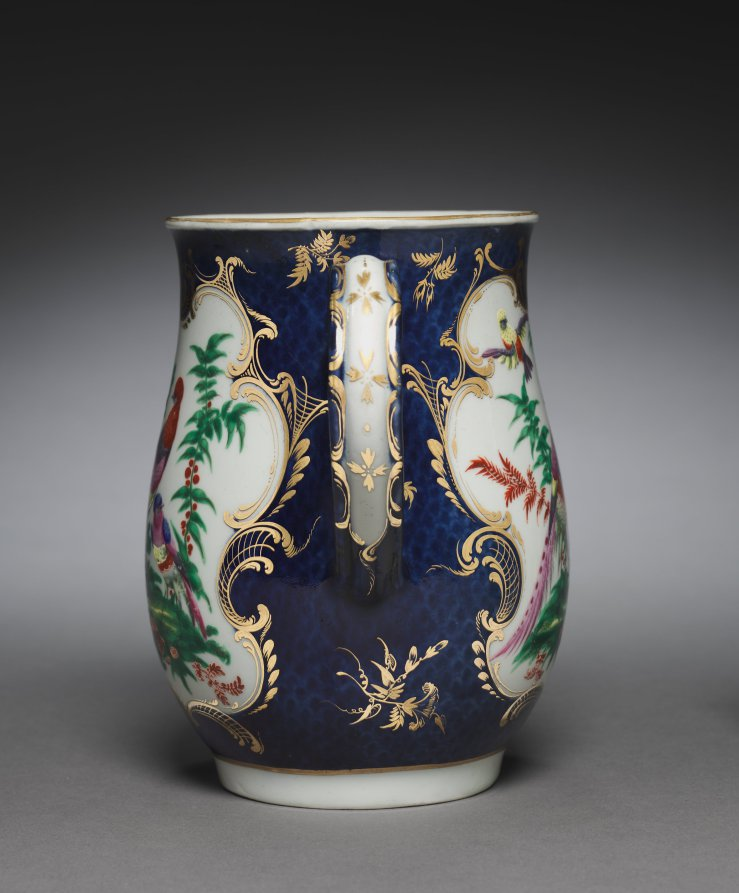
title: Tankard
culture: England, 18th century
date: c. 1770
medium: ceramic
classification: Ceramic